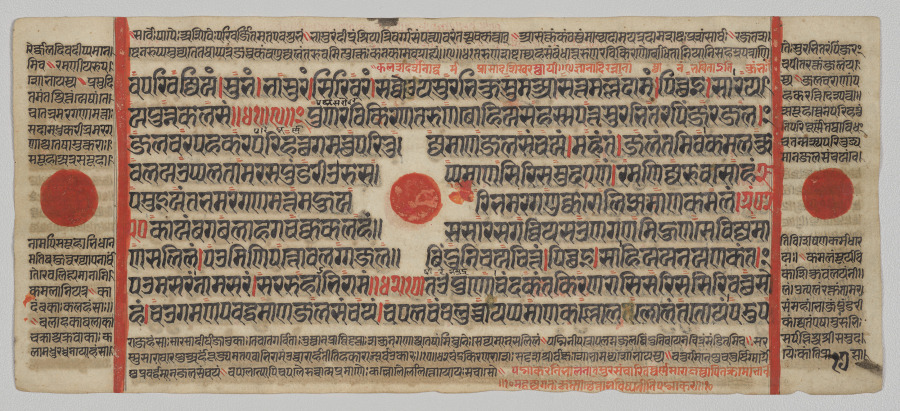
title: Text, Folio 17 (verso), from a Kalpa-sutra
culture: Western India, Gujarat, last quarter of the 15th century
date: c. 1475–1500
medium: Gum tempera, ink, and gold on paper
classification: Painting